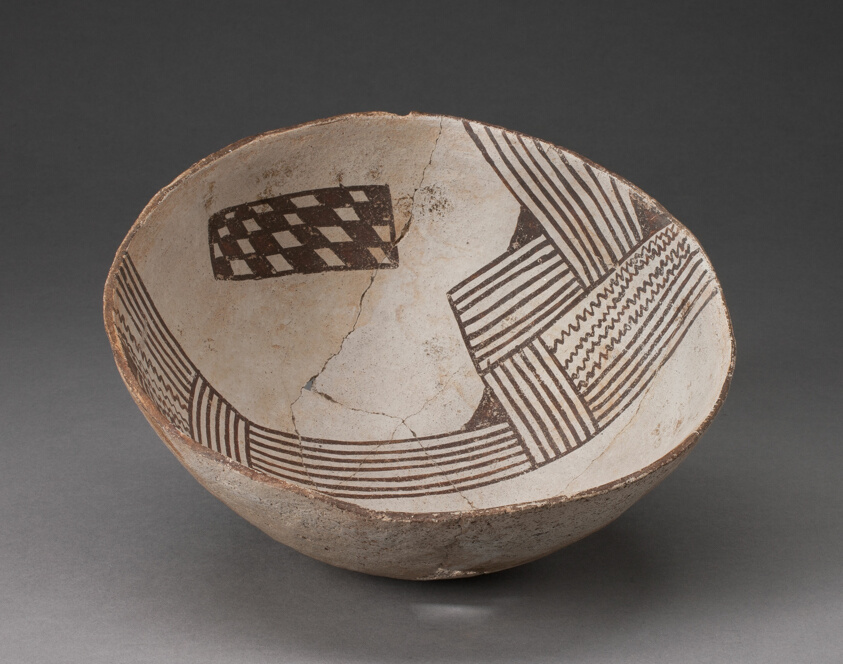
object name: Vessel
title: Bowl with Bold, Irregular Geometric Bands of Stripes, Zigzag, and Checkerboard Motifs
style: cibola, native american, americas, southwest, Arts of the Americas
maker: Cibola, Posibly Kiatuthlanna Black-on-white; East-central Arizona or west-central New Mexico, United States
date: 850–950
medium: Ceramic and pigment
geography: Arizona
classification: bowl; earthenware; ceramics; vessel; art of the americas